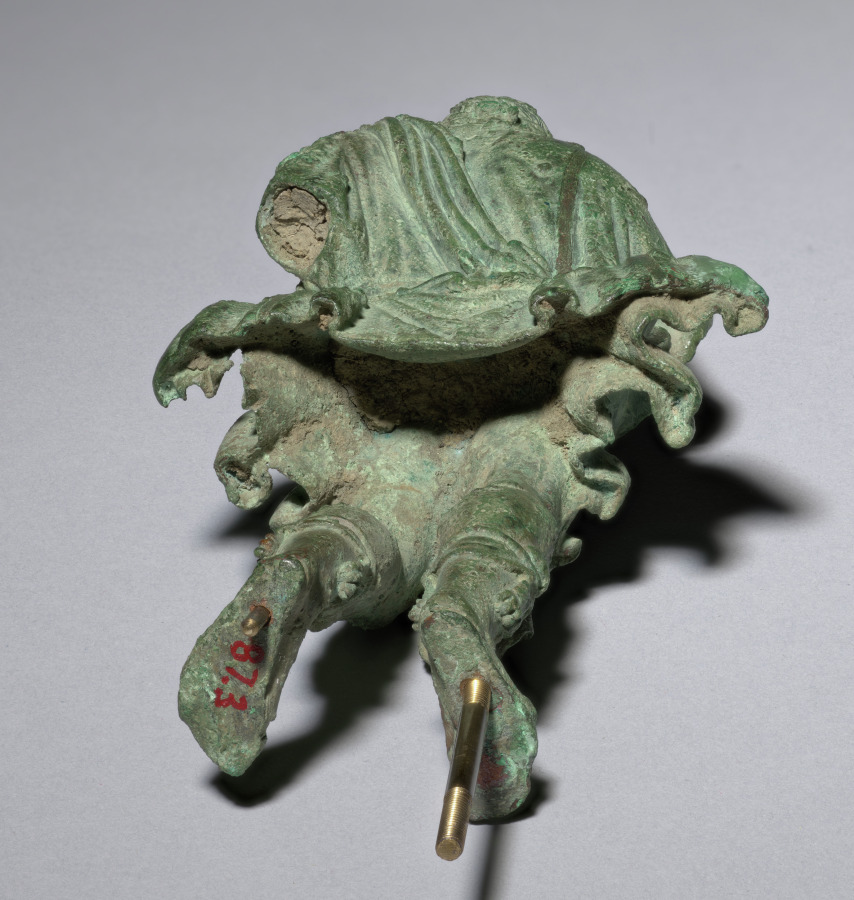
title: Lar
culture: Italy, Rome, Early Imperial period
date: 1–25 CE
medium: bronze with copper inlays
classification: Sculpture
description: This youthful bronze figure wears a short tunic with copper inlaid stripes and open-toed boots with animal-skin liners. The figure’s arms are missing, but based on other surviving examples, they likely held a libation dish and cornucopia. Even without these attributes, the figure can be identified through dress and stance as a type of Lar, or domestic deity, known as the Lar Familiaris (Household Lar), standing in a characteristic "quiet pose." Other types of Lares include the Lares Compitales and Lares Augusti (Lares of crossroads and of Augustus, respectively).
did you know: This statuette likely stood with other small bronzes in a household shrine called a lararium.